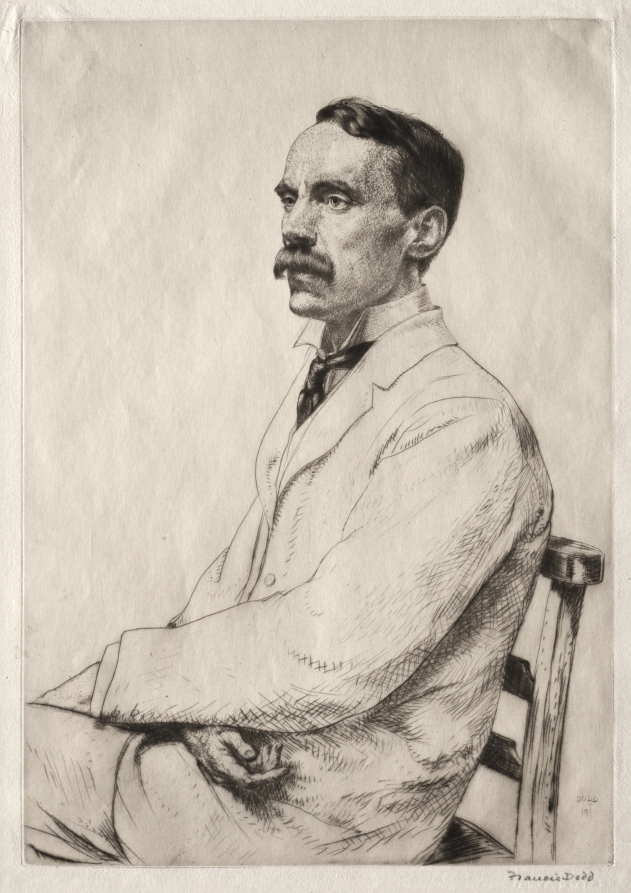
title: Walford Davis Green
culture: England, 20th century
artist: Francis Dodd (British, 1874–1949)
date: 1911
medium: drypoint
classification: Print